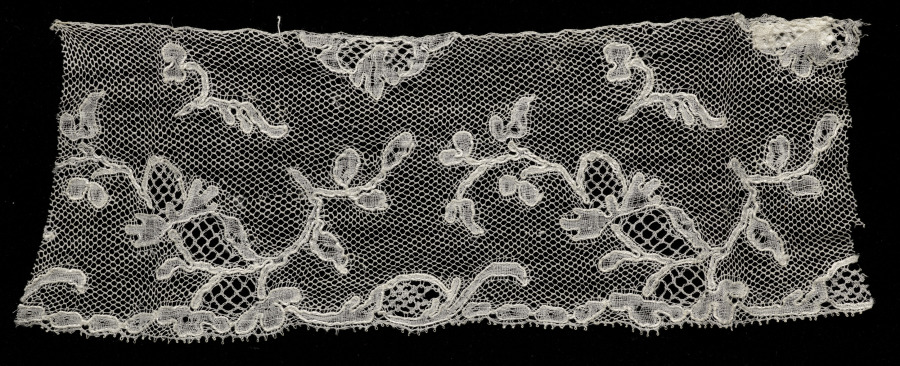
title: Lace Fragment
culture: Spain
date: 1700s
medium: Silk: bobbin lace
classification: Lace